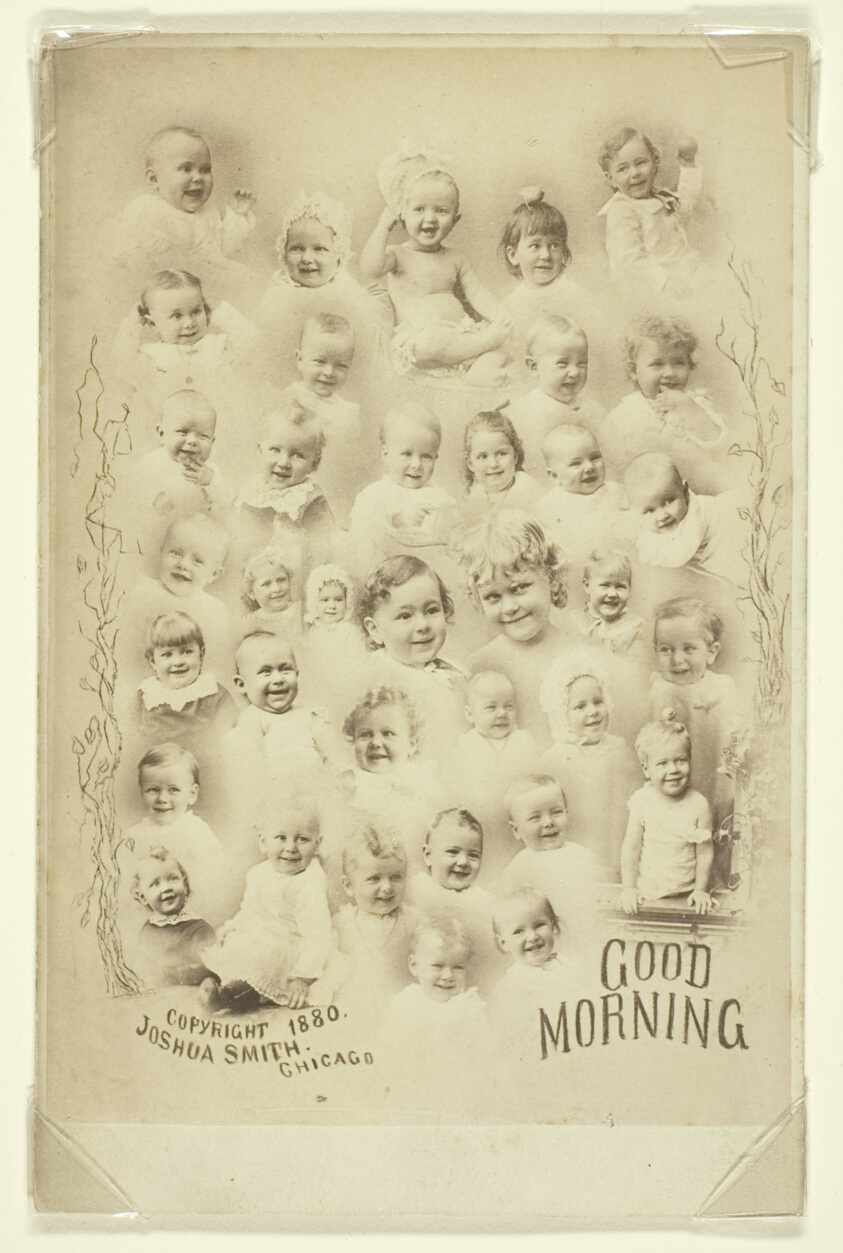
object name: Photograph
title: Good Morning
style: 19th century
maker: Joshua Smith (American, active 1860s)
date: c. 1880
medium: Albumen cabinet card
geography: United States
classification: albumen silver print; photographic process; photography; photograph